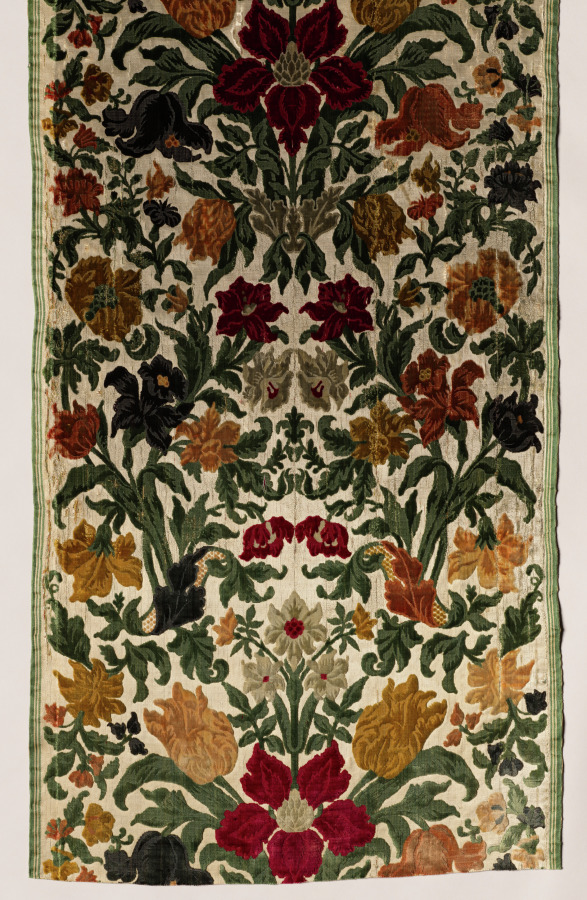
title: Length of Floral Velvet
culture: Italy, Genoa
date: 1600s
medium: velvet (cut, uncut, voided); silk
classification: Velvet